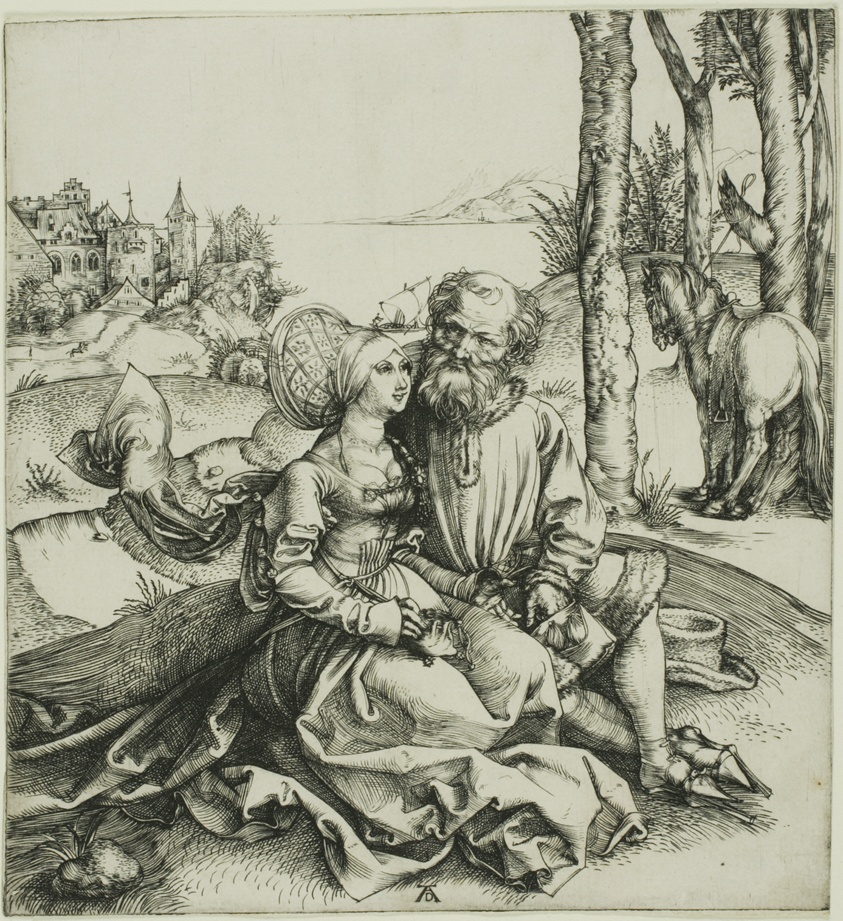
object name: Print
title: The Ill-Assorted Couple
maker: Albrecht Dürer (German, 1471-1528)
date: c. 1496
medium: Engraving in black on ivory laid paper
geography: Germany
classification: engraving; print; prints and drawing; paper